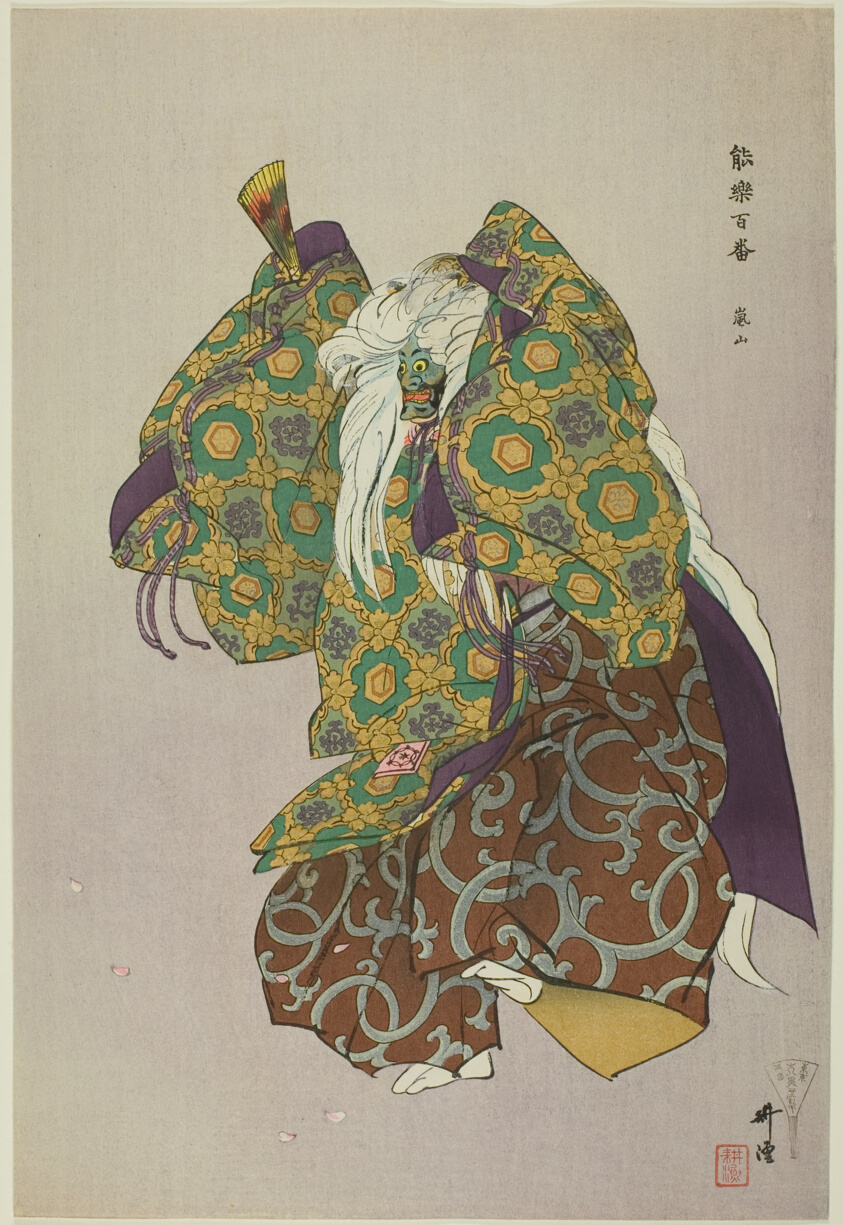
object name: Print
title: Arashiyama, from the series "One Hundred No Dramas (Nogaku hyakuban)"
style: Japanese (culture or style)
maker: Tsukioka Kogyo; Japanese, 1869-1927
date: 1898/1903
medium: Color woodblock print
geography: Japan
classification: woodblock print; print; asian art